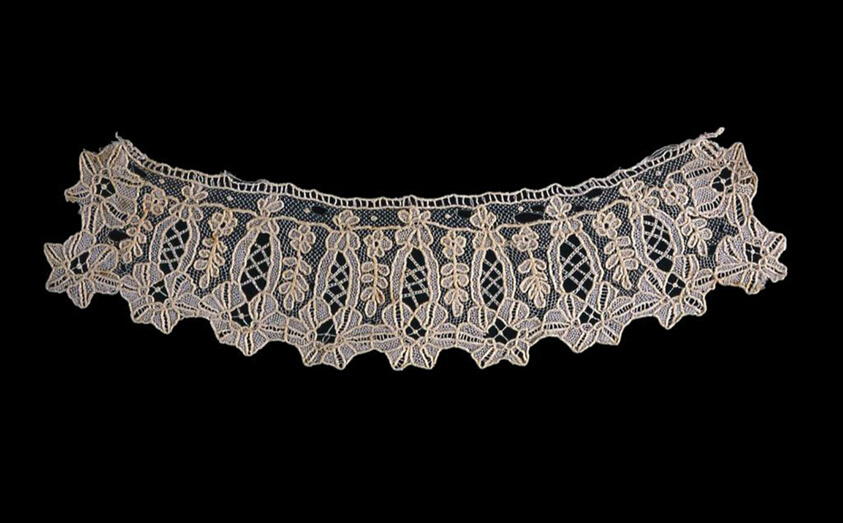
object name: Textile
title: Collar or Cuff (Fragment)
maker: Belgium, Brussels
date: 1860s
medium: Cotton, needle lace of a type known as "Point de Gaze"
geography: Brussels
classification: textile; lace - needle; lace